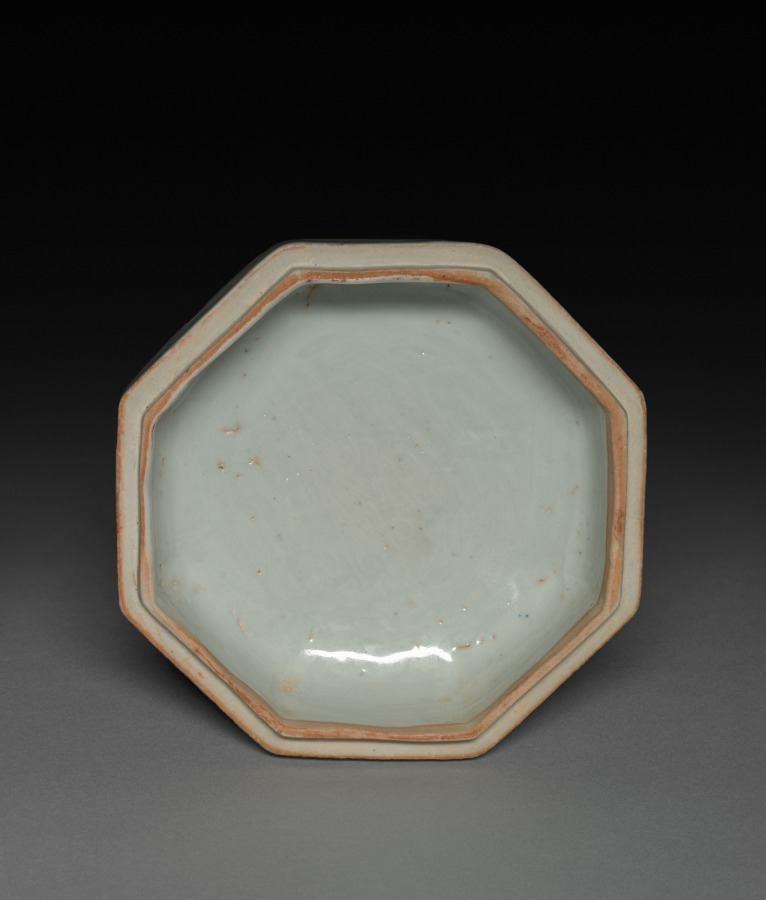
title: Hexagonal Covered Box with Lions in Relief: Qingbai Ware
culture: China, Jiangxi Province, Jingdezhen kilns, Yuan dynasty (1271–1368)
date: 1300–1325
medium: glazed porcelain with molded and applied decoration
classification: Ceramic